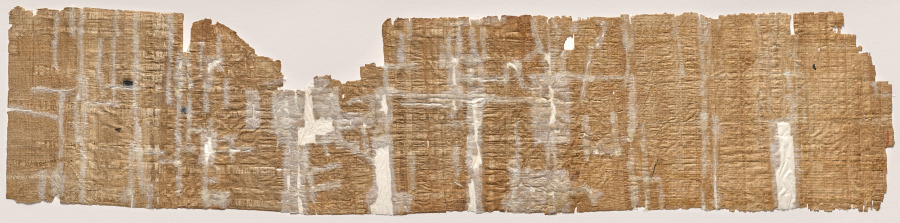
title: Book of Amduat, Perhaps of Bakenmut, with Elements of the Tenth through Twelfth Hours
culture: Egypt, Third Intermediate (1069–715 BCE), Dynasties 21–22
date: 1000–900 BCE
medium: papyrus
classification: Funerary Equipment